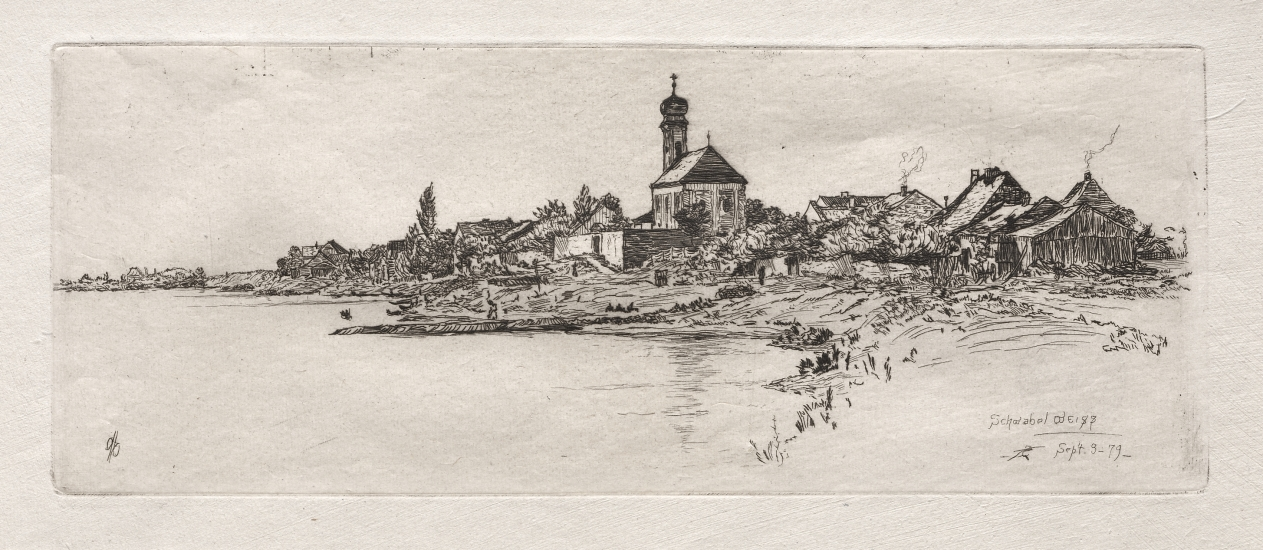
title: Schwabel Weiss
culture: America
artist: Otto H. Bacher (American, 1856–1909)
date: 1879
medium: etching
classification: Print